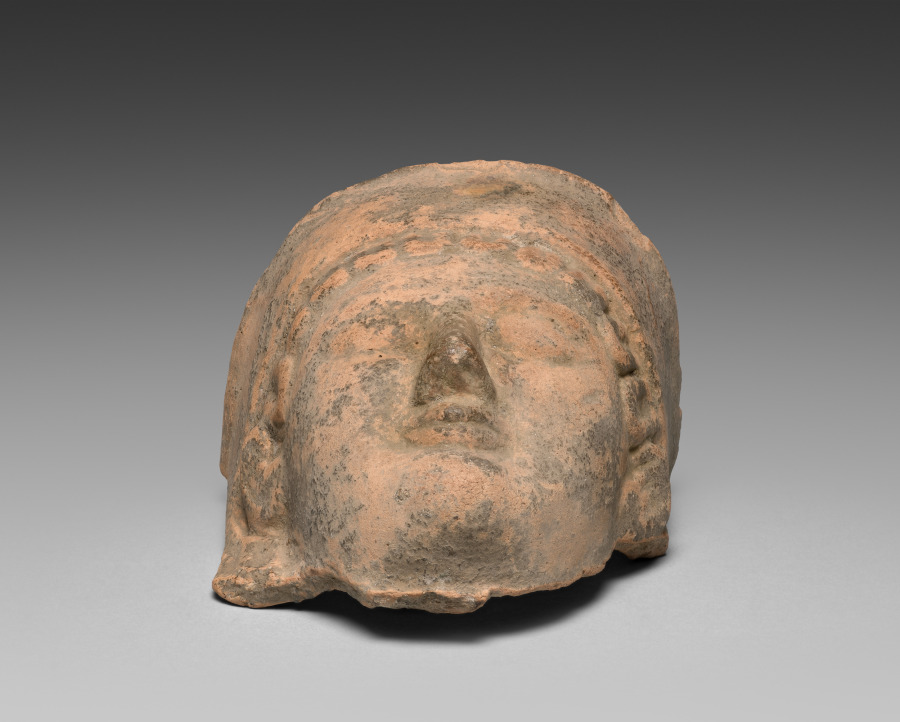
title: Mask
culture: Greece, Sicily, Selinus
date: 550 BCE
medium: terracotta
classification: Sculpture